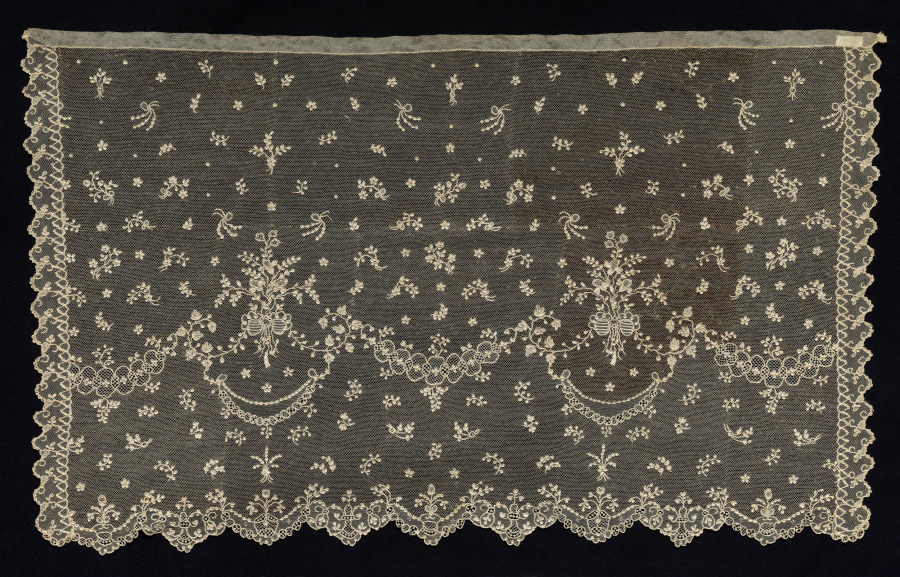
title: Lace Bonnet Veil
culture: France, Alençon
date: 1760–99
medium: Linen: needle lace (Point d'Alençon)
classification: Lace